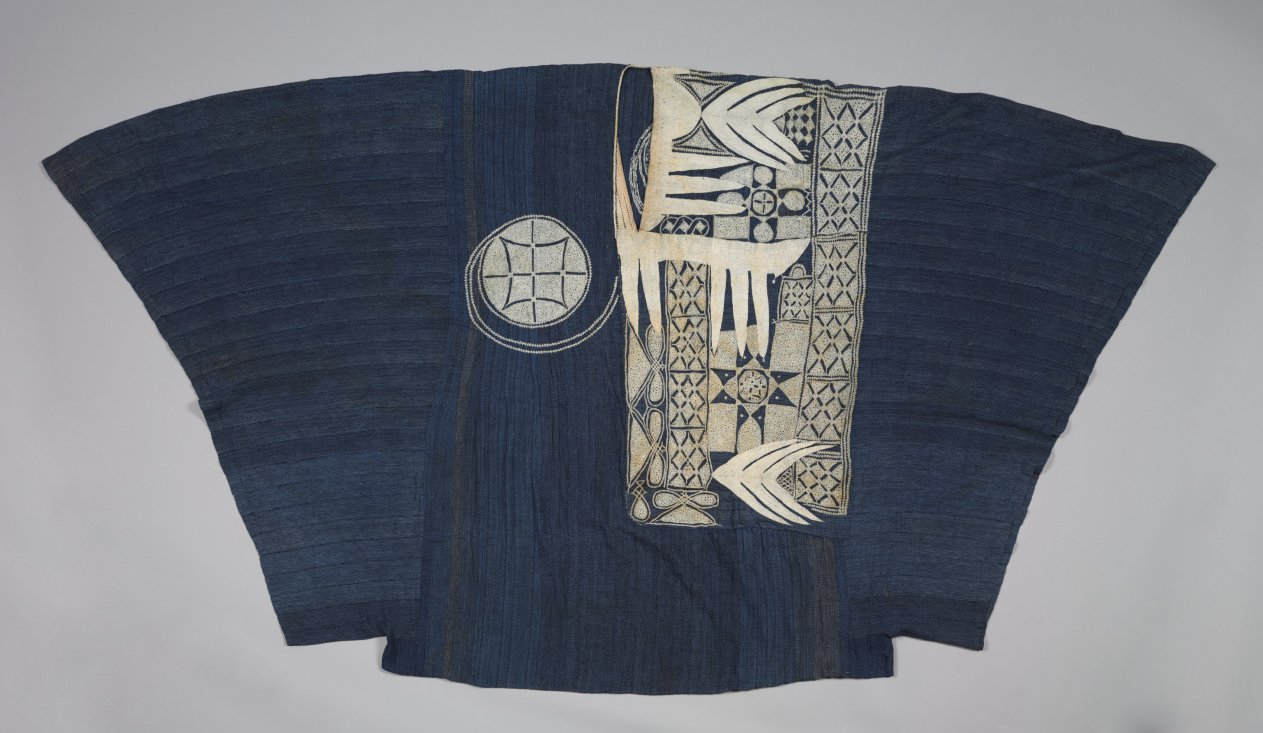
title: Prestige robe (riga)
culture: Africa, West Africa, Nigeria, probably Hausa-style or Nupe-style weavers and embroiders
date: late 1800s–by 1910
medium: Cotton, silk, and indigo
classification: Garment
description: Elite Nigerian men wore voluminous status garments variously called riga (Hausa), agbádá (Yorùbá), boubou (French), or mbubb (Wolof). Punctuated with white silk, this strip-woven riga’s inky blue was achieved by repeatedly dipping threads into indigo dye before weaving them. Embroiderers were often skilled Arabic calligraphers; the motifs here once had protective Islamic symbolism. The front pocket features the pointed “eight knives” (aska takwas) and a leaf (gambiya) associated with the Nupe peoples. At back, a spiral leads the wearer toward God. Magenta silk imported via trans-Saharan routes lines the hem. Rigan historically held transcultural appeal; today, they are pan-Nigerian male national dress.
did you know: Its owner's movements would have revealed a flash of magenta silk (an expensive trade good) along the hem of this riga, emphasizing his high status.